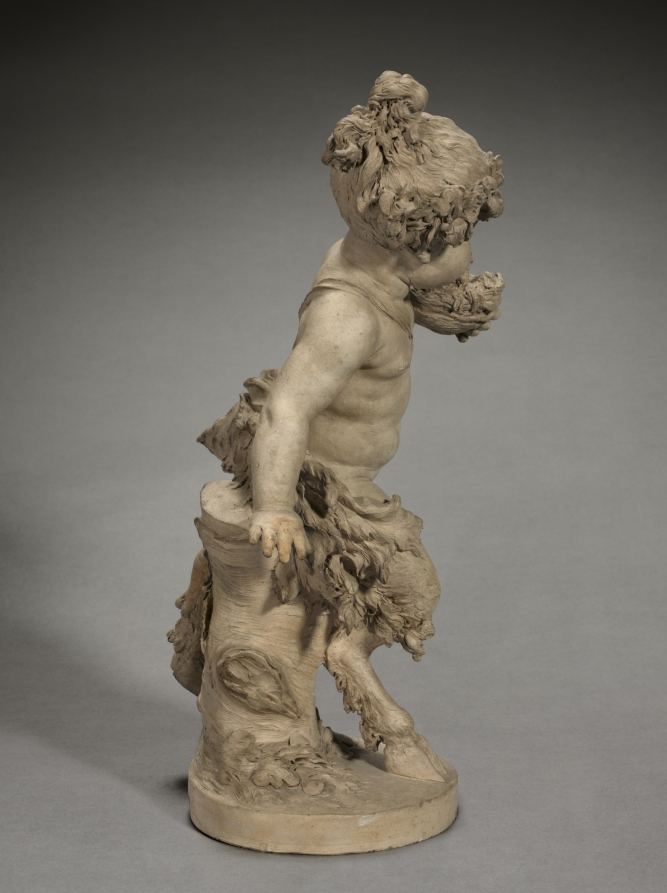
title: Young Satyress Running with an Owl's Nest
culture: France, 18th century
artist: Clodion (French, 1738–1814)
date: 1770s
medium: terracotta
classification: Sculpture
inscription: signature incised on back: CLODION.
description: These works by French sculptor Claude Michel, known as Clodion (1738–1814), shows a pair of young satyrs. Clodion was fond of depicting characters from classical antiquity in his work, and the subject of child or baby satyrs in Bacchanalian celebrations appear often in the work of Rococo artists. The female satyr wraps a plump arm around a nest filled with baby birds, while her male counterpart holds an owl. Balancing on one foot, the two flee the scene of their theft.